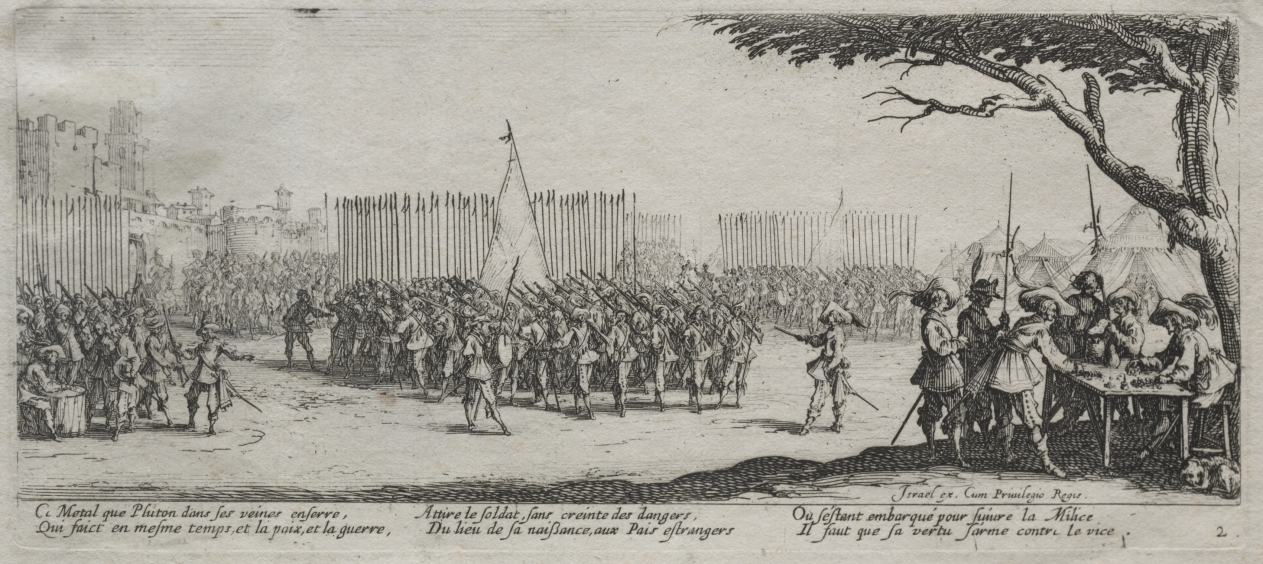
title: The Large Miseries of War: Enrollment of the Troops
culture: France, 17th century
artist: Jacques Callot (French, 1592–1635)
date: 1633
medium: etching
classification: Print